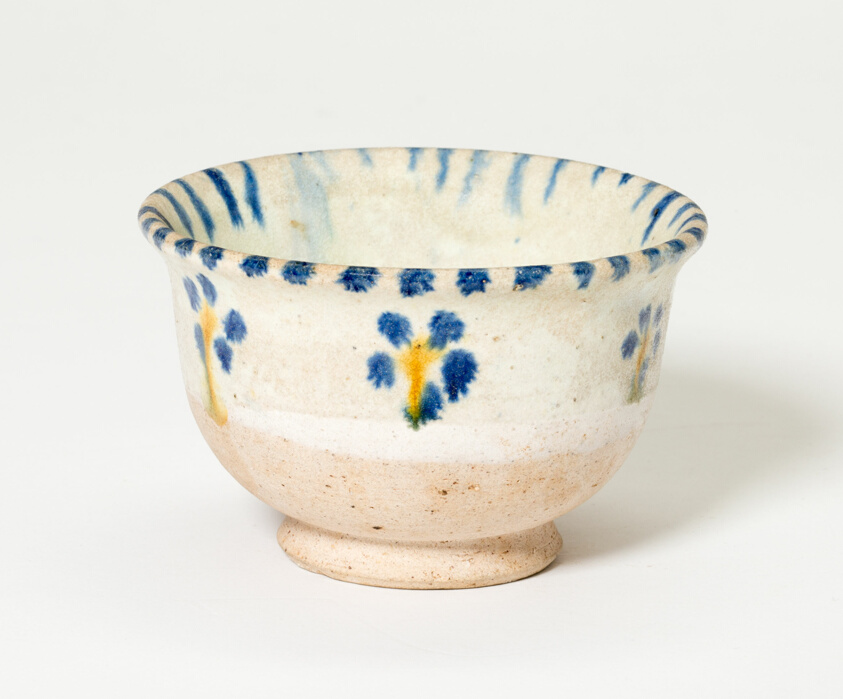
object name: Vessel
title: Cup with Streaks and Stylized Florets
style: Chinese (culture or style)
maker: China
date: Tang dynasty (618–906)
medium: Slip-coated earthenware with cobalt blue and lead amber streaks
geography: China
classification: drinking vessel; earthenware; asian art; ceramics; vessel